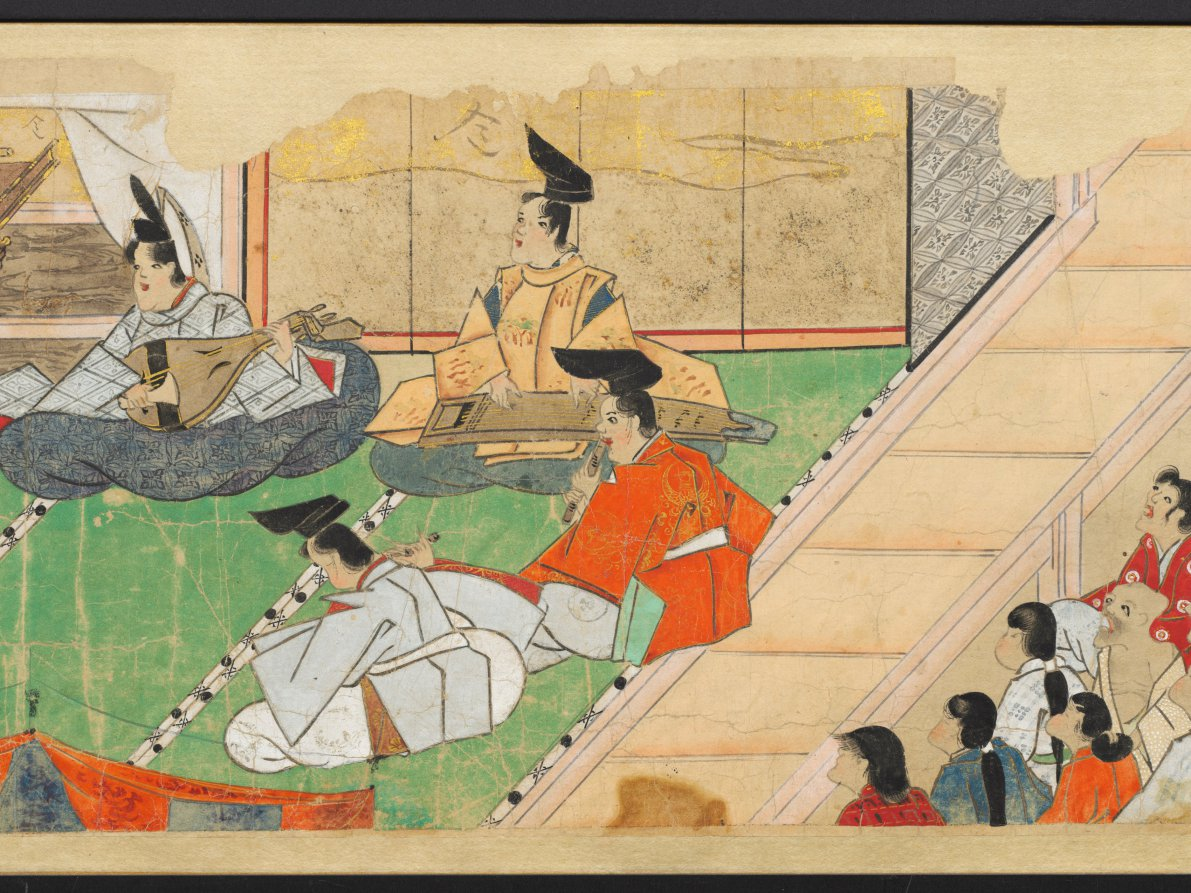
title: The Saltmaker's Story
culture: Japan, Edo period (1615–1868)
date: early 1600s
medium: One of a pair of handscrolls; ink, color, and gold on paper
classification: Painting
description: Once read and copied by girls at New Year’s celebrations and included in dowries, The Saltmaker’s Story is a rags-to-riches tale in which daughters are gifts from the gods. Despite his simple outlook, the main character progresses from humble roots as an associate at Kashima Shrine to the elite status of grandfather of the emperor through the intervention of the Kashima deity. The Saltmaker’s Story is traditionally presented in a set of three scrolls, but the text of this set has been removed by a previous owner, who remounted the illustrations as a pair. The paintings of this one take us from right to left through the second half of the tale.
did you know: This handscroll originally had texts before its paintings, but the texts were removed.